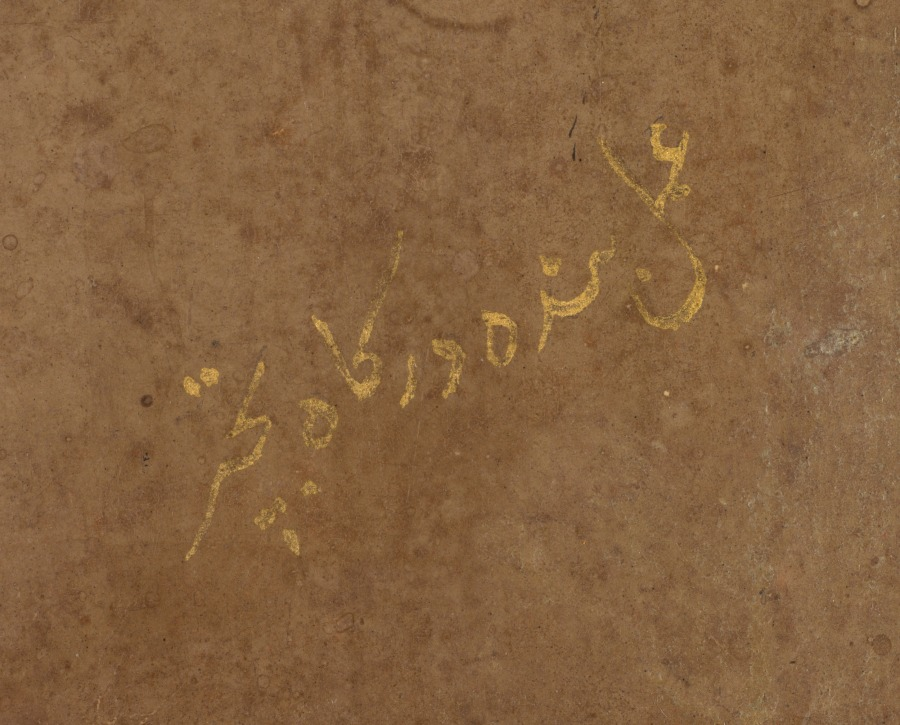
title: Portrait of Raja Jagat Singh of Nurpur (reigned 1618–46)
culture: Mughal India, Court of Jahangir (reigned 1605 - 27), possibly Lahore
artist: attributed to Bichitr (Indian, active c. 1615–50)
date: probably 1619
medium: Gum tempera and gold on paper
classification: Painting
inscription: ascription in lower right corner: amal - i bandieh dargah Bichitr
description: Jagat Singh was a prince from a small kingdom in the western Himalayan foothills who grew up at the imperial Mughal court of Jahangir and his queen Nur Jahan. He was given the title of prince in 1619, and this painting may commemorate that event. Very few nobles from the hill states had positions at the Mughal court at this time, so his portrait is a rare imperial Mughal painting. The emperor and his favorite wife frequently visited Nurpur, named “City of Light” in their honor, to hunt and relax, and Prince Jagat Singh was a favorite of the queen. She interceded on his behalf in 1624, when he joined a rebellion to dethrone her husband.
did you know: Jagat Singh, shown in this miniature, was a favorite of the Mughal queen.